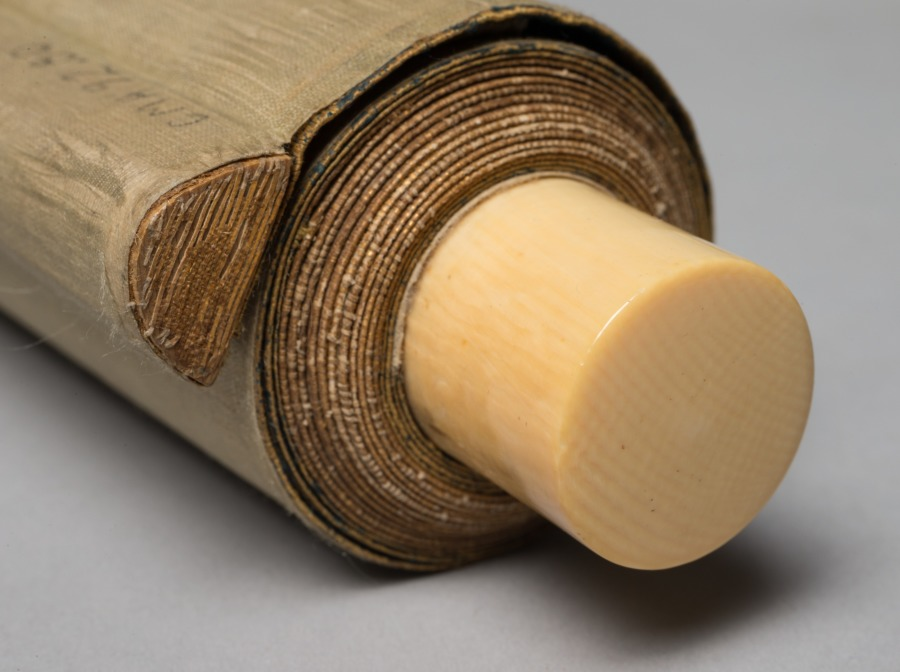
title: Sparrows on Blossoming Plum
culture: Japan, Edo period (1615–1868)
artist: attributed to Kano Tan’yū (Japanese, 1602–1674)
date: 1661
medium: One of a triptych of hanging scrolls; ink and slight color on silk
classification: Painting